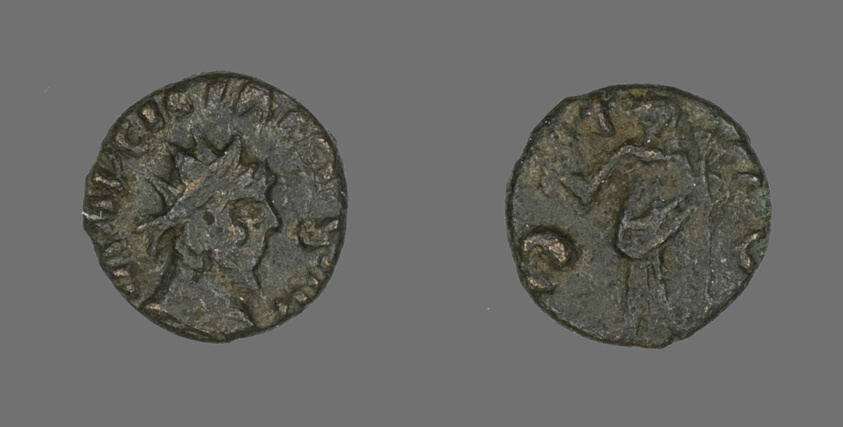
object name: Coin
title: Coin Portraying the Radiate Bust of an Emperor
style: roman (ancient, style or period), ancient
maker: Roman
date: 3rd century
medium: Bronze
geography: Roman Empire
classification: coin; ancient art